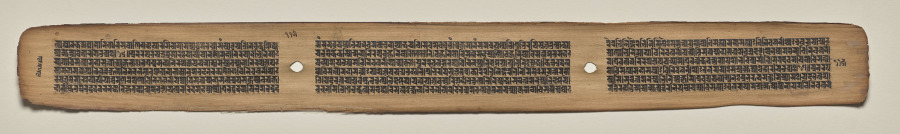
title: Text, Folio 115 (verso), from a Manuscript of the Perfection of Wisdom in Eight Thousand Lines (Ashtasahasrika Prajnaparamita-sutra)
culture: Eastern India, Bihar, Vikramashila Monastery. Painting: Nepal, Kathmandu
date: Sunday, September 14, 1119 (year 239 of the Newar Samvat in the month of Ashvina)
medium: gum tempera and ink on palm leaves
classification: Painting